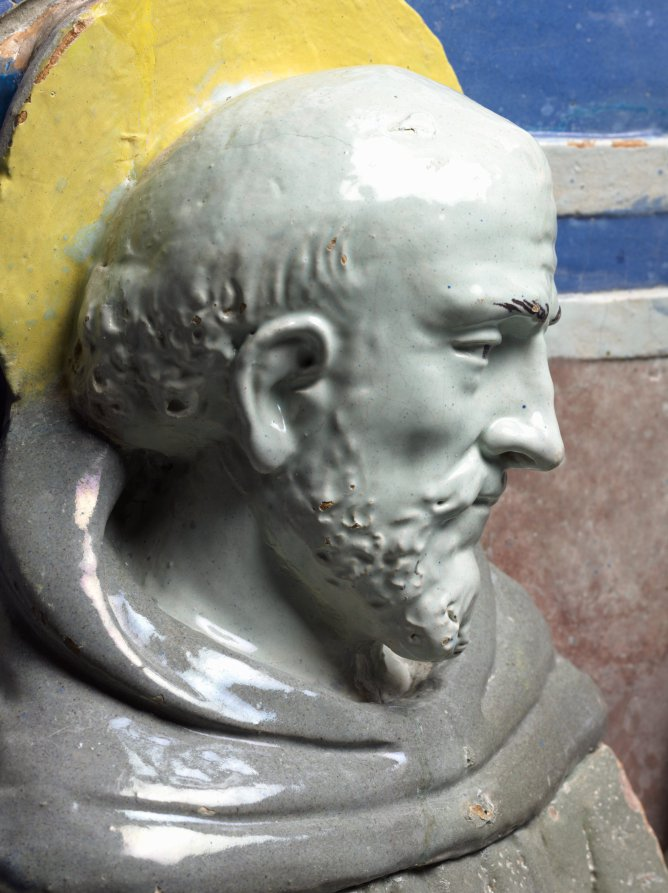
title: Virgin and Child Enthroned with Saints Francis and Giovanni Gualberto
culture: Italy, Florence, 16th century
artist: Benedetto Buglioni (Italian, 1461–1521)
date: c. 1510–20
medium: glazed terracotta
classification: Sculpture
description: The Madonna sits upon a throne with the Christ child standing on her knee. He is steadied by his mother, turning delicately to grasp her robe for support. On the left is Saint Francis, identified by his stigmata. On the right, Saint Giovanni Gualberto is identified by his monk's robe and distinctive processional cross. The brown robes of the saints, the purple of the Virgin's tunic, and the flesh tones of the figures contrast strongly against the bright blue background. In the semicircular sky behind the figures, three winged cherub heads emerge, representing a host of angels. Glazed terracotta is both durable and decorative and the gleaming white of this piece would have stood out in the darkness of a church. The medium was made popular by Renaissance artist Luca della Robbia and came into fashion as a substitute for expensive carved marble. A rounded arch frame embellished with fruit and flower garlands as well as egg-and-dart and cord moldings accompanied the work when it was acquired, but was later determined not to be original and removed. Buglioni's work bears the influence of the della Robbias, particularly in the simple color scheme. Buglioni likely worked in the studio of Luca's nephew, Andrea, where he would have learned the technique of glazing terracotta.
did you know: The unusual purple hue is particular to the artist.